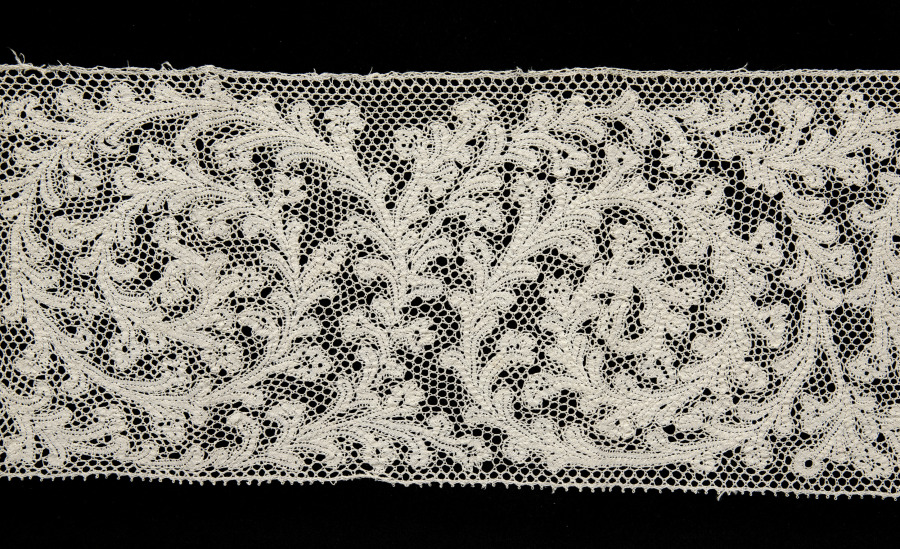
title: Lace Band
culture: Italy, Milan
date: 1600s–1700s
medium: Bobbin lace (Punto di Milano)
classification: Lace